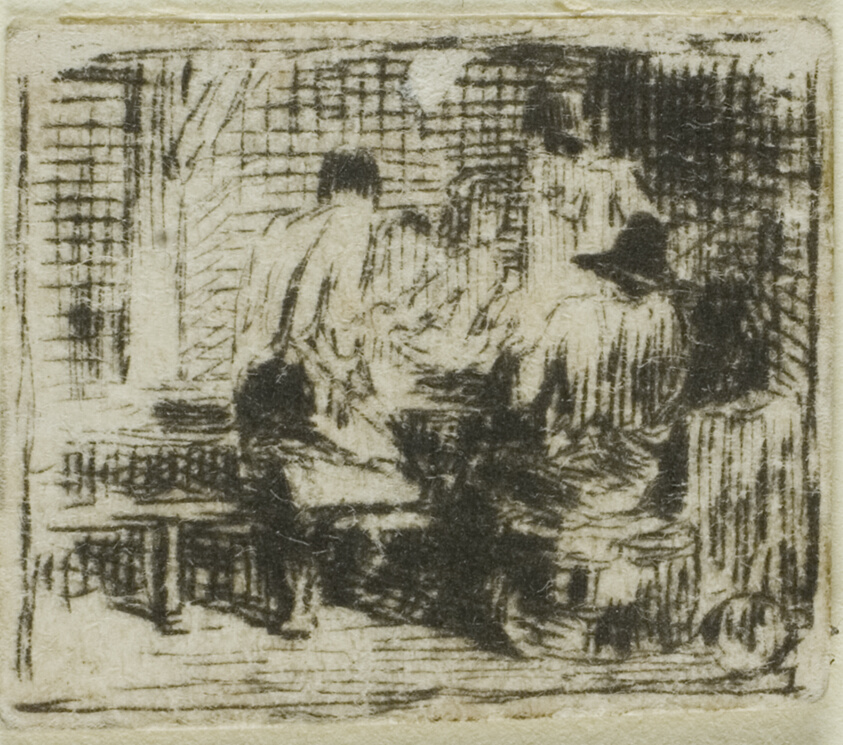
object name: Print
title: Drinkers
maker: Charles Émile Jacque (French, 1813-1894)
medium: Etching on ivory wove paper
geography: France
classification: etching; print; prints and drawing